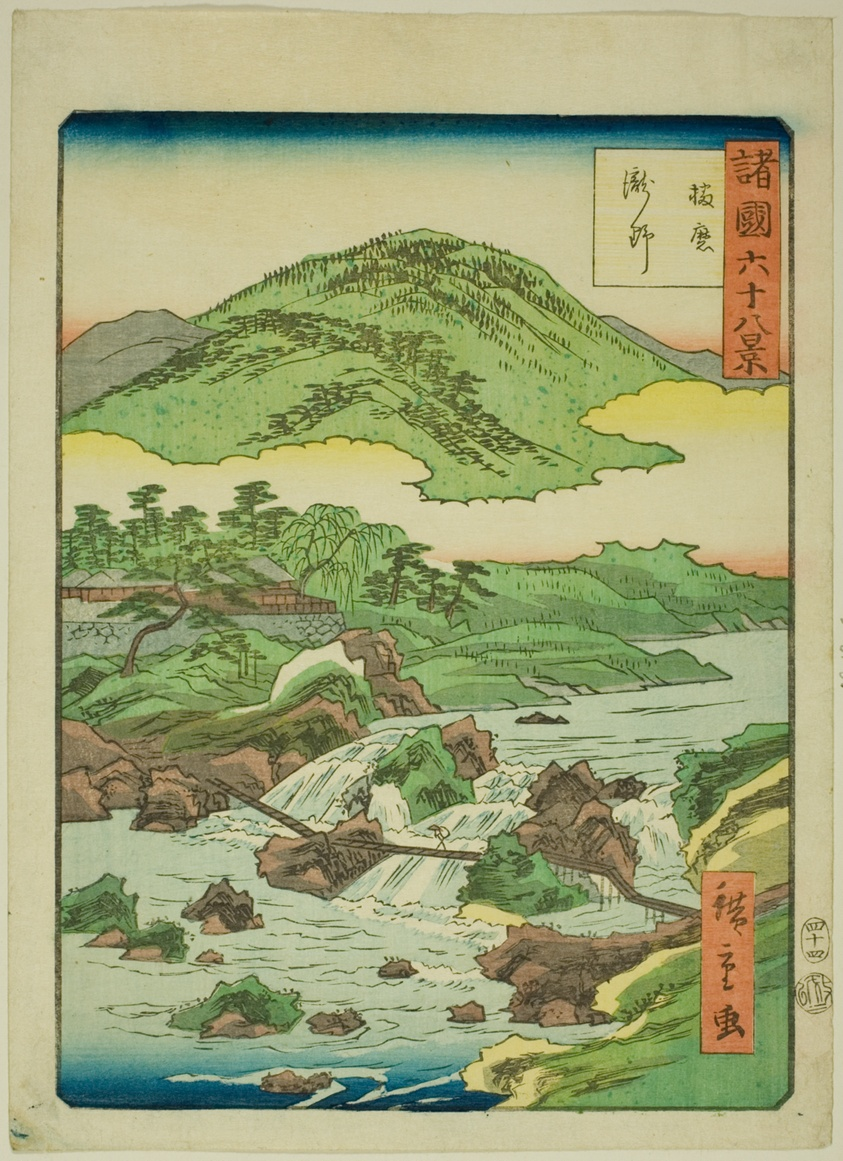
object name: Print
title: Takino in Harima Province (Harima Takino), no. 44 from the series "Sixty-eight Views of the Various Provinces (Shokoku rokujuhakkei)"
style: Japanese (culture or style)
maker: Utagawa Hiroshige II (Shigenobu) (Japanese, 1826-1869)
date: 1862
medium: Color woodblock print; chuban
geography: Japan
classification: print; asian art